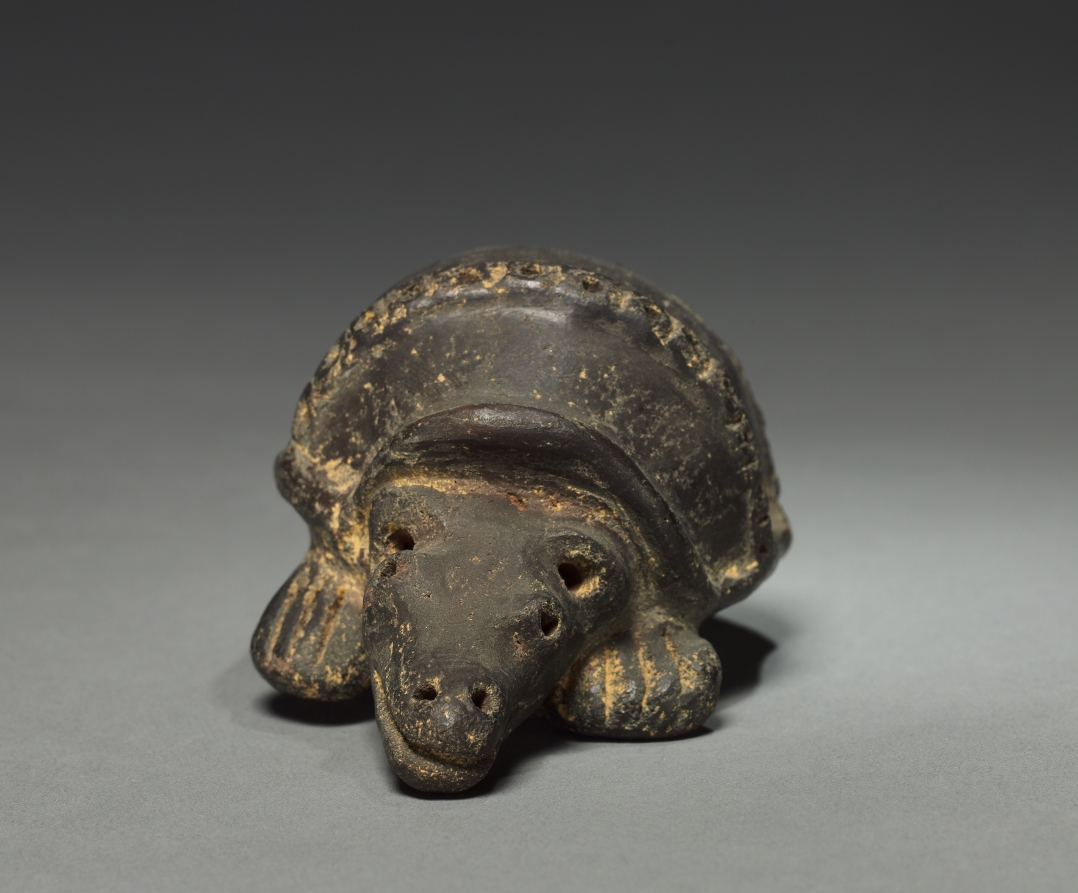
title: Armadillo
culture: Colombia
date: before 1921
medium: pottery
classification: Ceramic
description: Rattles that combine ravens, humans, and frogs are among the best known but least understood of the Northwest Coast object types. They clearly have mythic import and may have originated as shamans’ implements. But historically chiefs used them during secular parts of winter dances.